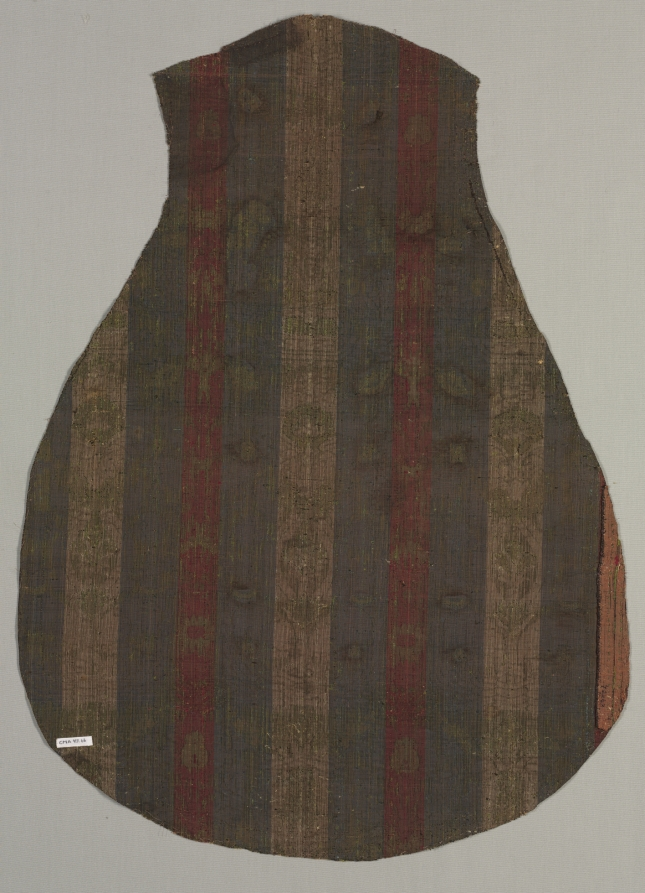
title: Six-Color Chasuble Front with Animal Pattern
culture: Italy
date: 1415–25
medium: Silk, polychrome velvet with cut pile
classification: Velvet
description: Few velvets were woven in Italy with as many as six colors of pile, such as this front panel from a chasuble. The chasuble is the main sleeveless outer vestment worn by priests while officiating during Mass. The resulting weave highlights a complex animal pattern in which deer appear behind a fence and peacocks flank a fountain above—an artistic fashion that emerged in the 1300s. This complicated weaving process was gradually abandoned during the 1400s in favor of monochrome floral patterns that were often embellished with gold.